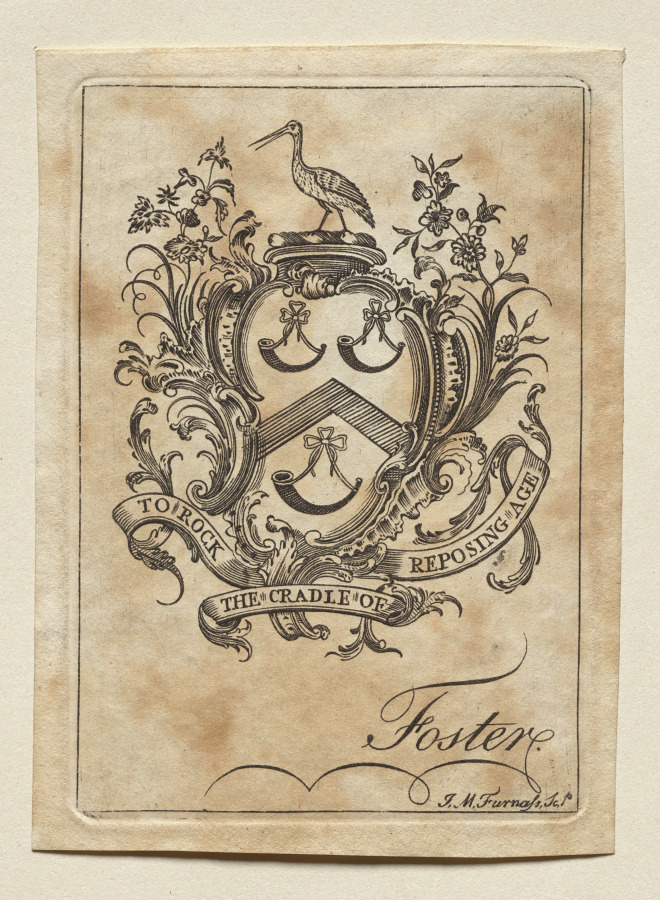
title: Bookplate: Coat of Arms with Foster inscribed below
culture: America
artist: John Mason Furnass (American, 1763–1804)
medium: engraving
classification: Print